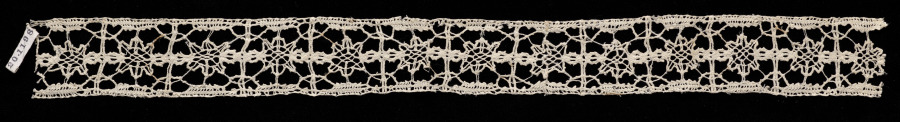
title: Lace Insertion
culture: Italy, Venice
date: late 1500s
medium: Bobbin lace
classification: Lace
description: This piece of bobbin lace is based on a needle lace (reticella) design, and is similar to another piece of bobbin lace in the CMA's collection: 1920.1192.